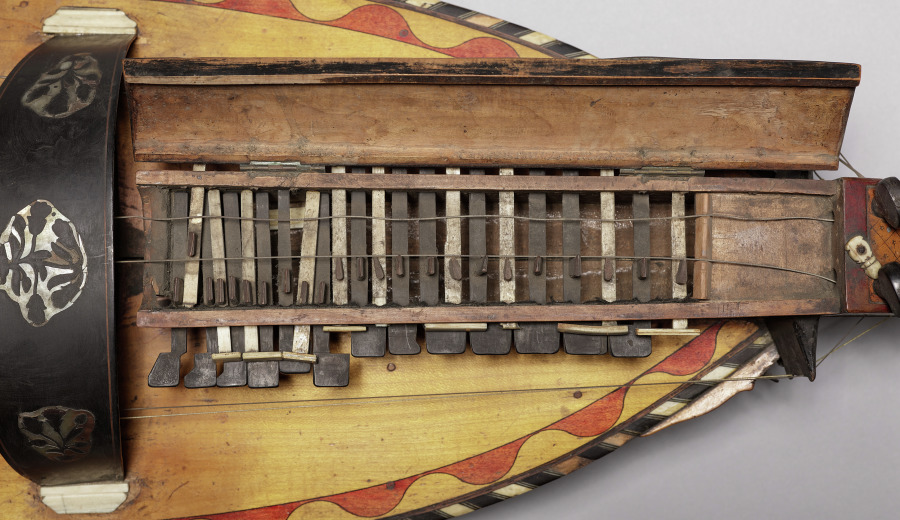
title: Vielle à roue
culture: France, 18th century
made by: Pajot of Jánzat (French)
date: 1700s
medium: wood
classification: Musical Instrument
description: The instrumentalist could play melodies on the keyboard that presses tangents against one or more strings. Often there are also multiple drone strings, which give a constant pitch accompaniment to the melody, resulting in a sound similar to that of bagpipes. This type of instrument is depicted in several artworks in the CMA collection: 1924.656, 2008.34.2, 1960.20. The vielle à roue is also related to the Swedish nyckelharpa, which was featured on the CMA performing arts series in 2017 played by Emilia Amper.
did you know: Also known as a “hurdy-gurdy” or “wheel fiddle,” this instrument produces sound by a hand crank-turned rosined wheel rubbing against the strings.